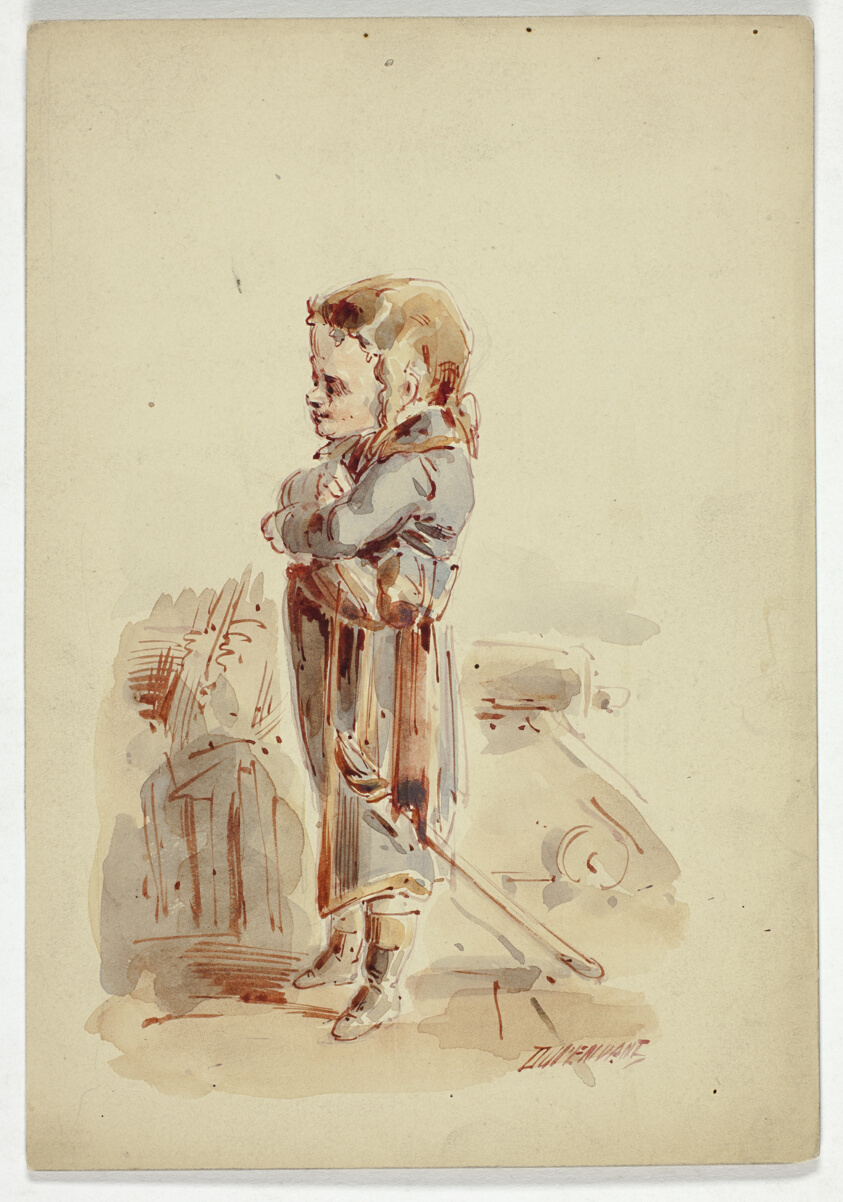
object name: Drawing and Watercolor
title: Boy Posing as Admiral on Ship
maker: Dupenvant; French, 19th century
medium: Pen and red ink, with watercolor, over traces of graphite, on tan board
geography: France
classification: watercolor; drawings (visual works); prints and drawing